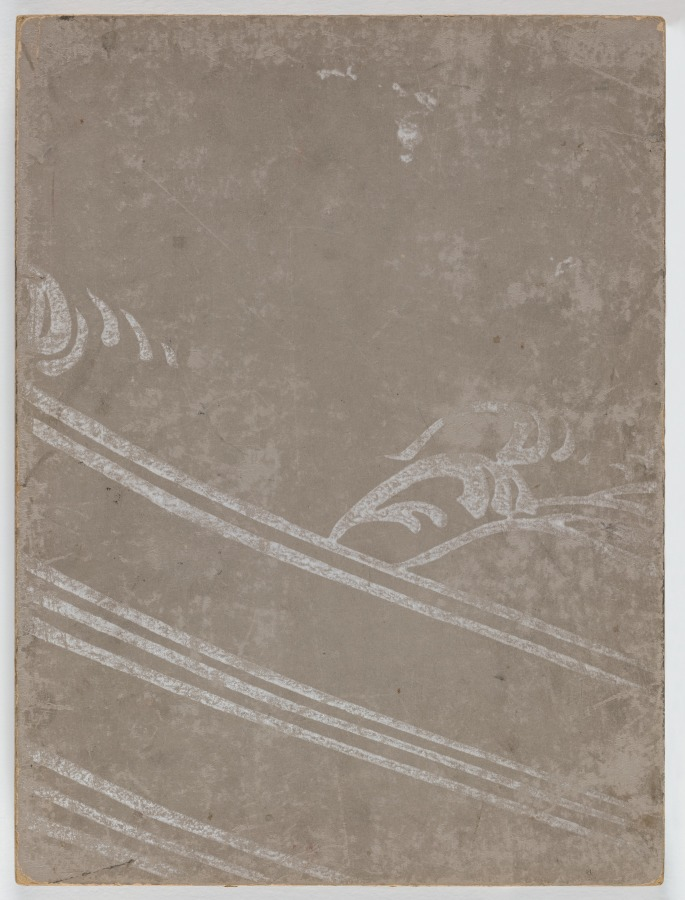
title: Flowers of a Hundred Worlds (Momoyogusa), Vol. 2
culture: Japan, Meiji period (1868–1912)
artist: Kamisaka Sekka (Japanese, 1866–1942)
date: 1909–10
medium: one of a set of three woodblock printed folding-books; ink, color, gold, and silver on paper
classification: Bound Volume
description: This volume from a set of three woodblock printed albums displays the graphic design prowess of Kamisaka Sekka. The images were first distributed one by one to subscribers to the series but later were reissued in bound form, like this book, for mass consumers. Each print features a vignette taken from nature or Japanese literature. Many of the scenes have a long history in Japan, originating in the 900s or 1000s and having been interpreted by all manner of artists since that time. Sekka’s selections hew closely to precedents from the Rinpa style originated by painter Tawaraya Sōtatsu (c. 1570–c. 1640) and calligrapher Hon’ami Kōetsu (1558–1637).